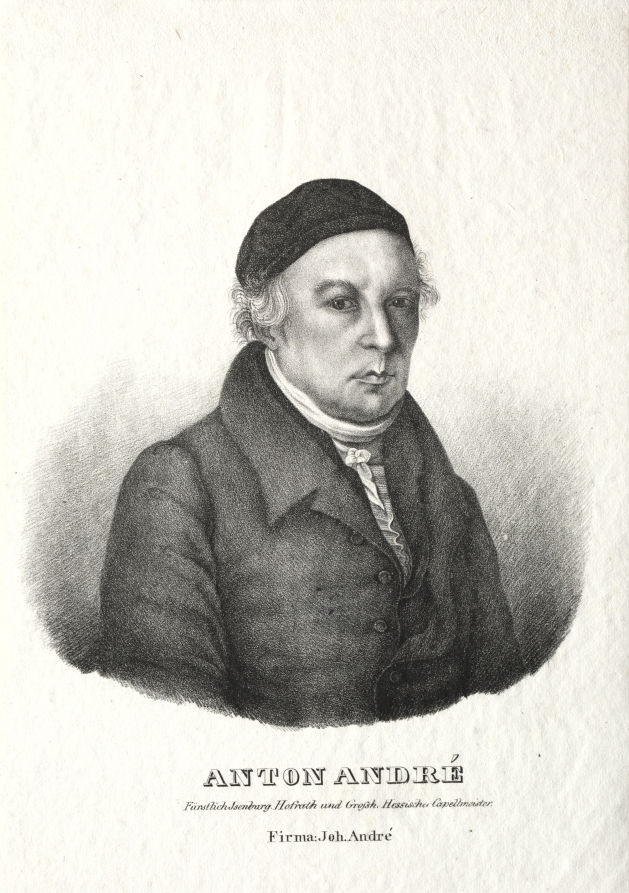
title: Portrait of Anton André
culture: Germany, 19th century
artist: Johann André (German, 1775–1842)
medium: lithograph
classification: Print